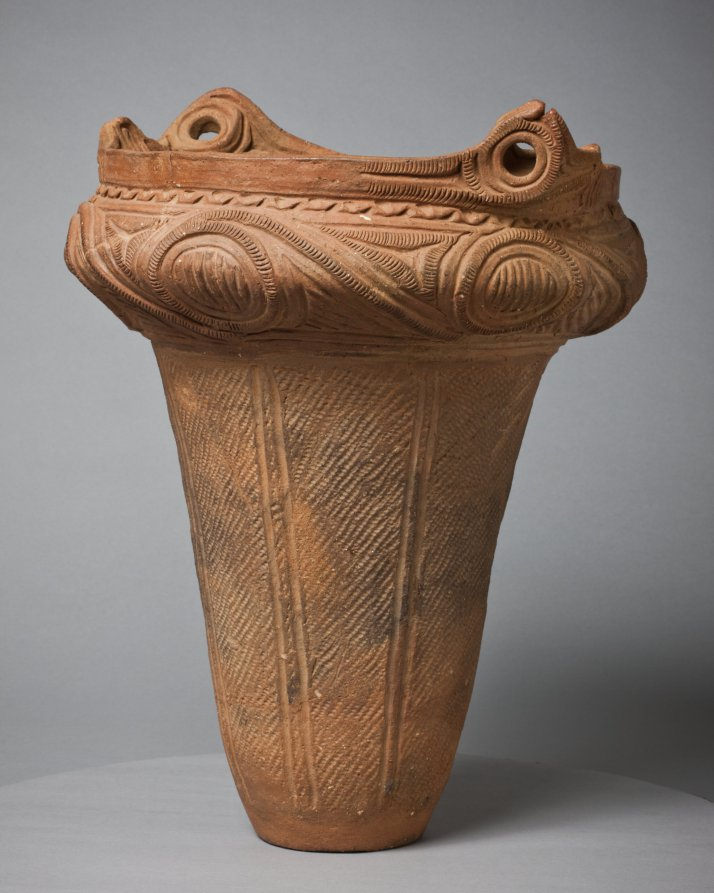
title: Urn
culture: Japan, Jōmon period (c. 10,500–300 BCE)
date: c. 2000 BCE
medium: earthenware, terracotta, impressed and incised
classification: Ceramic